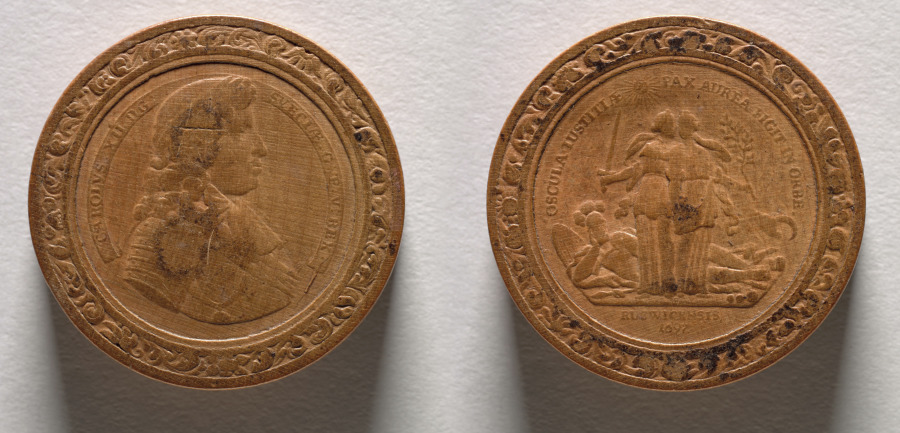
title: Gaming Piece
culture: Germany, late 17th-early 18th Century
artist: Martin Brunner (German, 1659–1725)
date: c.1700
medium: wood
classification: Furniture and woodwork